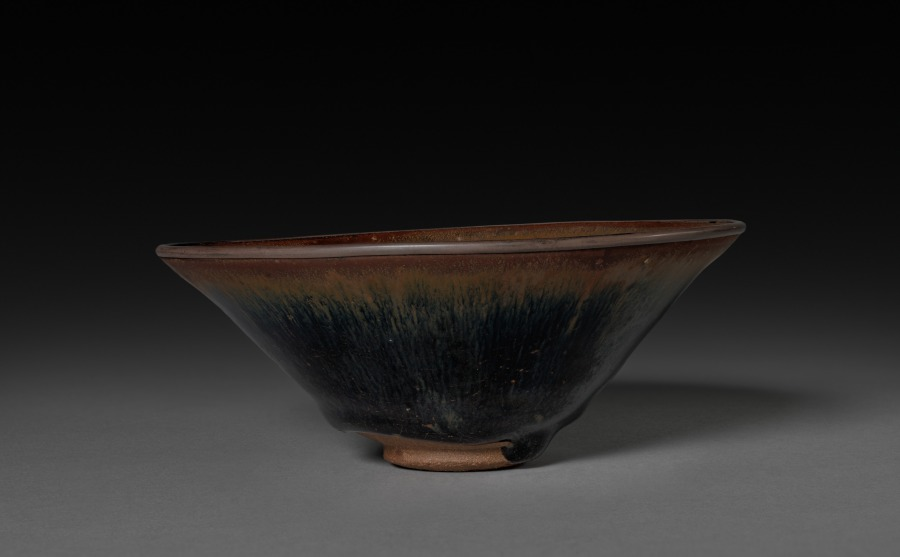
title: Tea Bowl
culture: China, Fujian province, Song dynasty (960-1279)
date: 960– 1279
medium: brown stoneware with iron slip glaze, Jian ware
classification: Ceramic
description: This tea bowl's coarse brown stoneware body was first covered with a thick, blue-black glaze. It was mottled with reddish-brown slip, whose pattern of streaks and spots are affectionately termed "hare's fur" among connoisseurs.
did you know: Jian ware was very popular with the tea cultures in China and Japan.